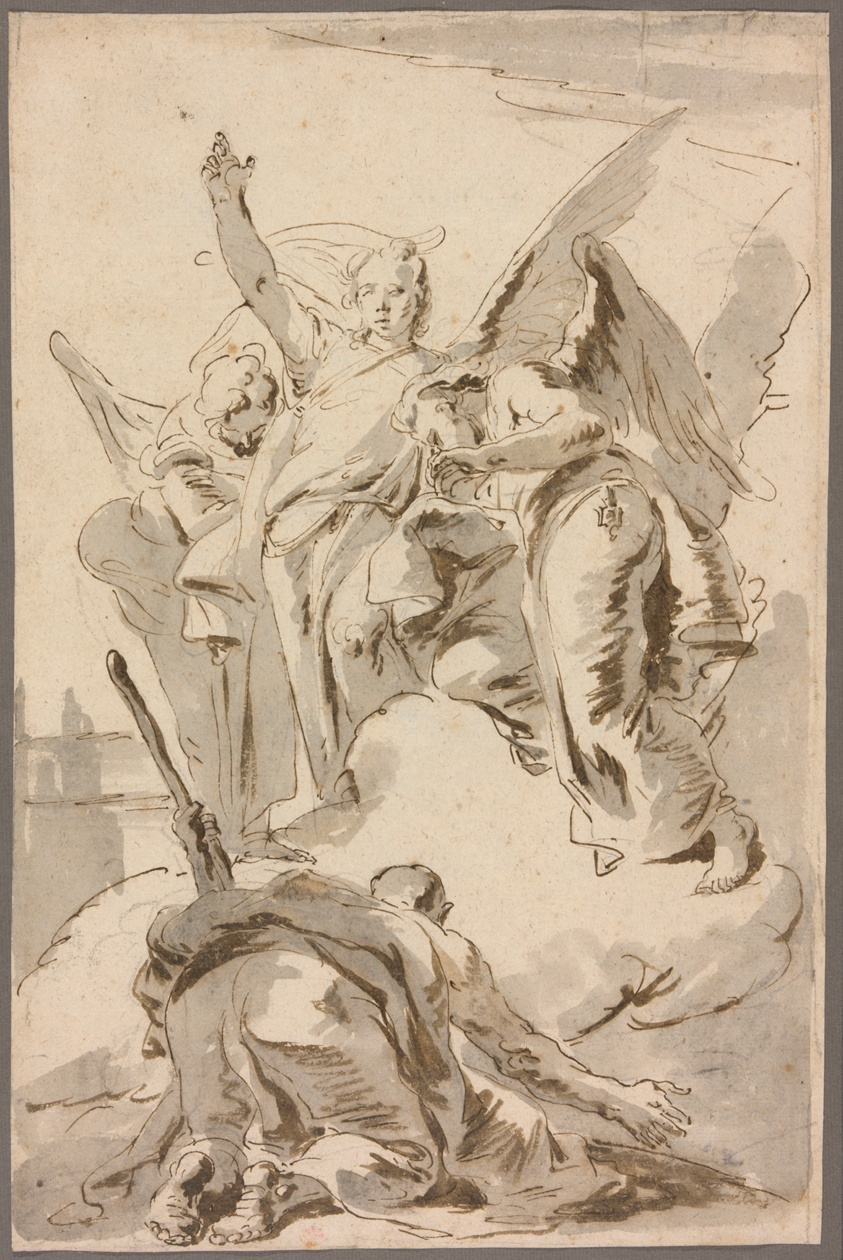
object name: Drawing and Watercolor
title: Three Angels Appearing to Abraham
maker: Giovanni Battista Tiepolo (Italian, 1696–1770)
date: c. 1726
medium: Pen and brown ink and brush and brown and gray wash, over black chalk, on ivory laid paper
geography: Italy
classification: pen and ink drawings; drawings (visual works); prints and drawing